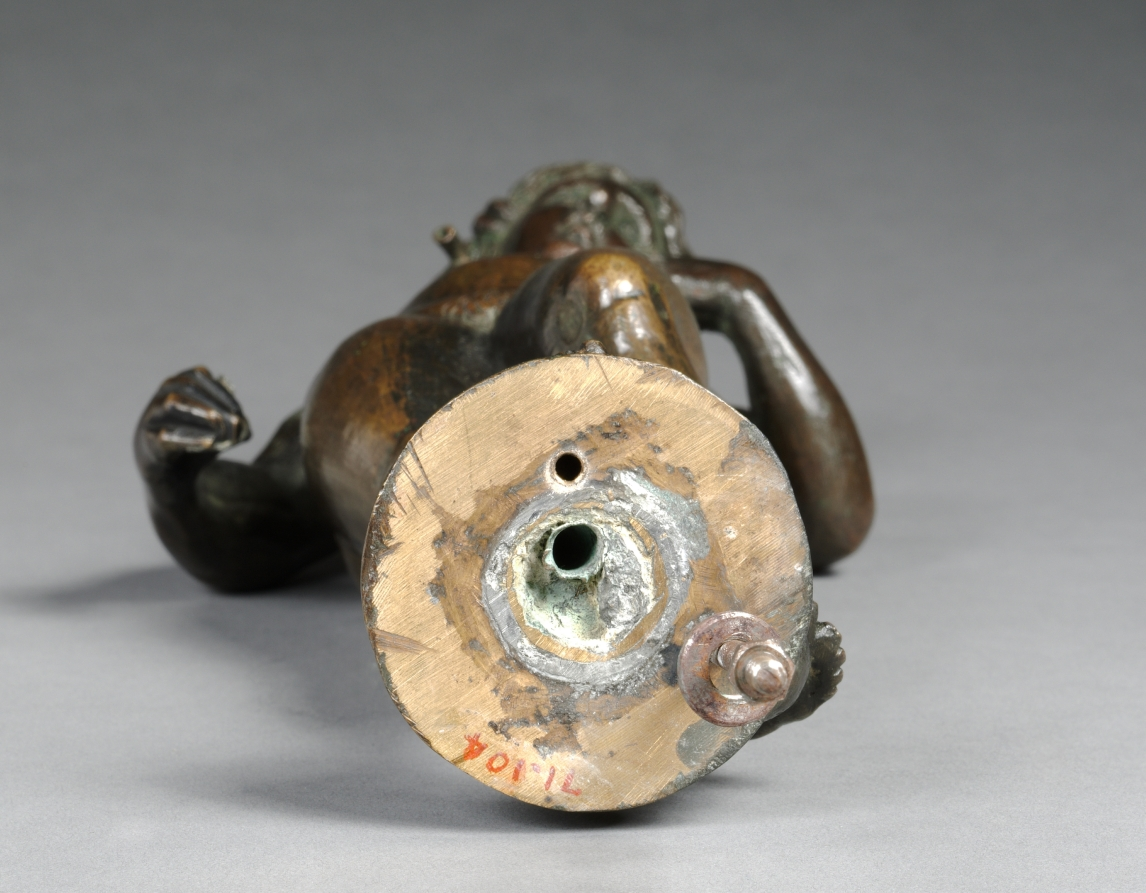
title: Fountain Figure of Abundance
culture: Germany, Augsburg, 16th century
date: c. 1530–40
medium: bronze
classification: Sculpture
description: The spout coming out of the breast indicates that this figure was part of a table fountain--a specialty of Augsburg artists. Her nudity and naturalistic proportions demonstrate the impact of Italian Renaissance art in southern Germany during the early 1500s.